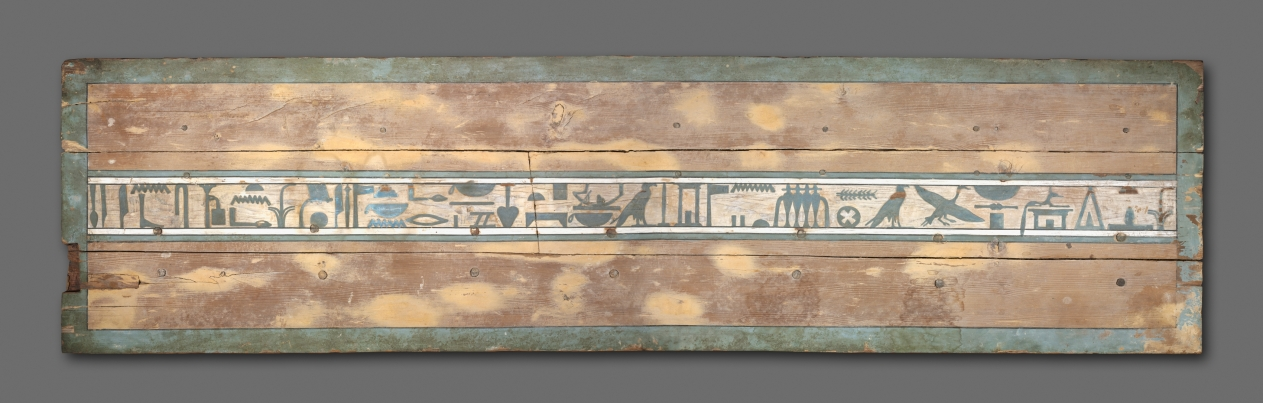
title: Coffin of Senbi (Lid)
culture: Egypt, Meir, Middle Kingdom (2040–1648 BCE), Dynasty 12, reign of Amenemhat II (1929–1895 BCE)–reign of Senusret III (1878–1839 BCE)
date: 1918–1859 BCE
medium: gessoed and painted cedar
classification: Funerary Equipment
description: This is the most common type of coffin during the Middle Kingdom. The mummy was placed on his left side, facing east, his head behind the two magical eyes. These--in the shape of human eyes, to which have been added the markings of a falcon's head--were supposed to enable him to behold the rising sun, reborn daily. The long horizontal inscriptions are prayers to Anubis (god of embalming) and Osiris (god of the dead) for offerings of food and drink and other items necessary in the afterlife. The short vertical inscriptions place him under the protection of various other cosmic and funerary deities.